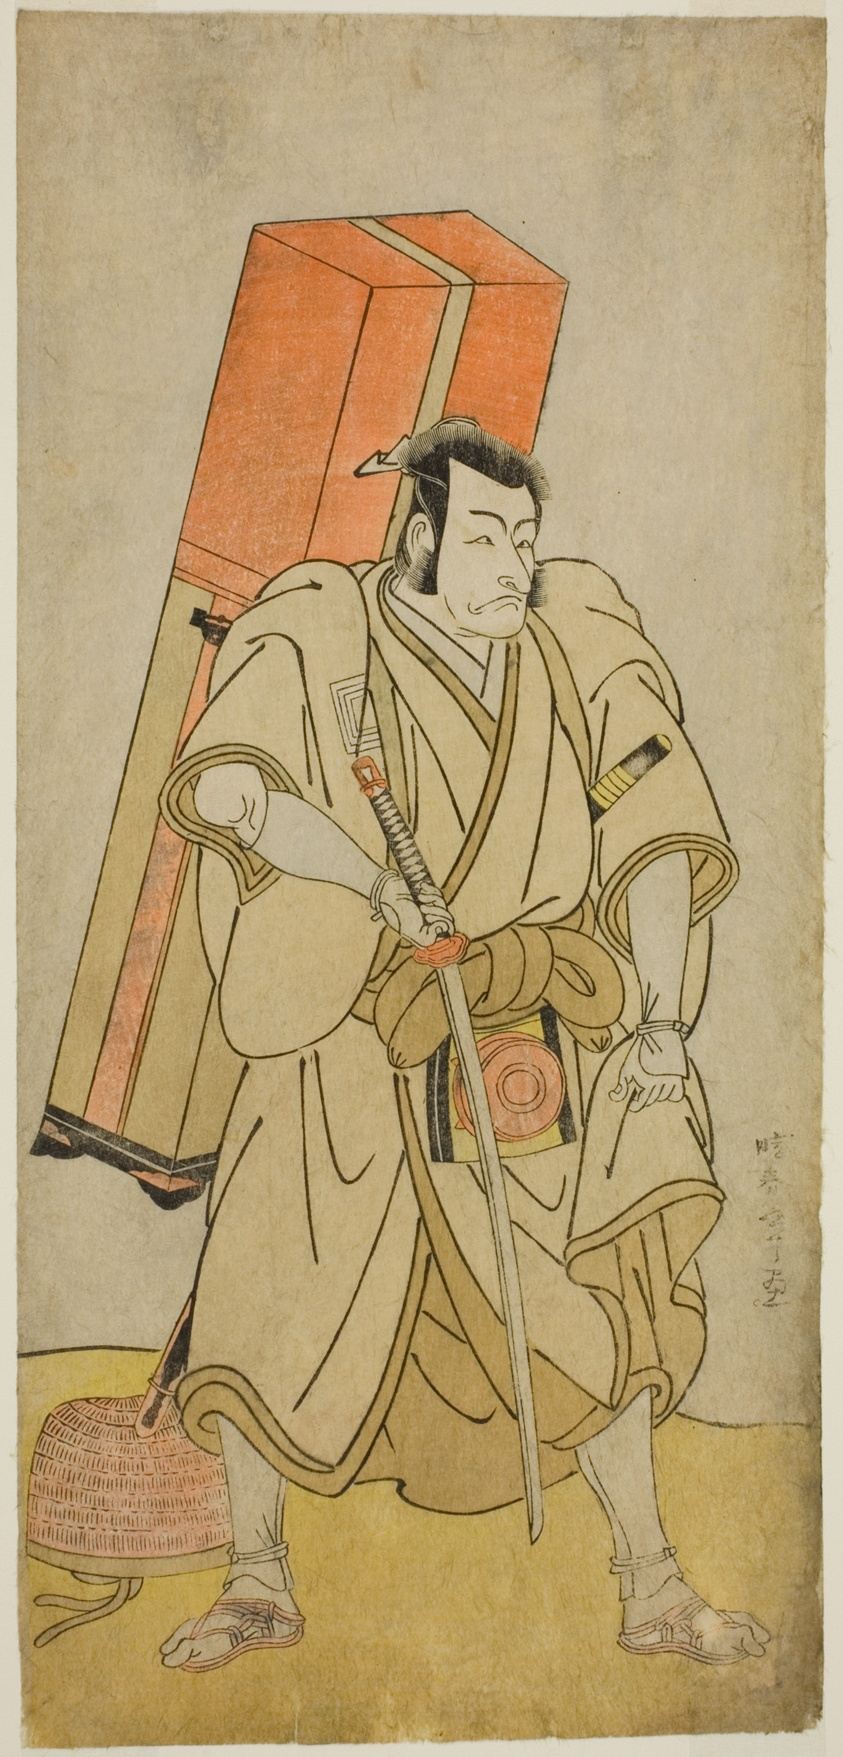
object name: Print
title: The Actor Ichikawa Danjuro V as Godai Saburo Masazumi Disguised as Rokuju-rokubu in the Play Sugata no Hana Yuki no Kuronushi, Performed at the Ichimura Theater in the Eleventh Month, 1776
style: Japanese (culture or style)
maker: Katsukawa Shunsho 勝川 春章; Japanese, 1726-1792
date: c. 1776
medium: Color woodblock print; hosoban; left sheet of diptych (?)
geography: Japan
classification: woodblock print; print; asian art